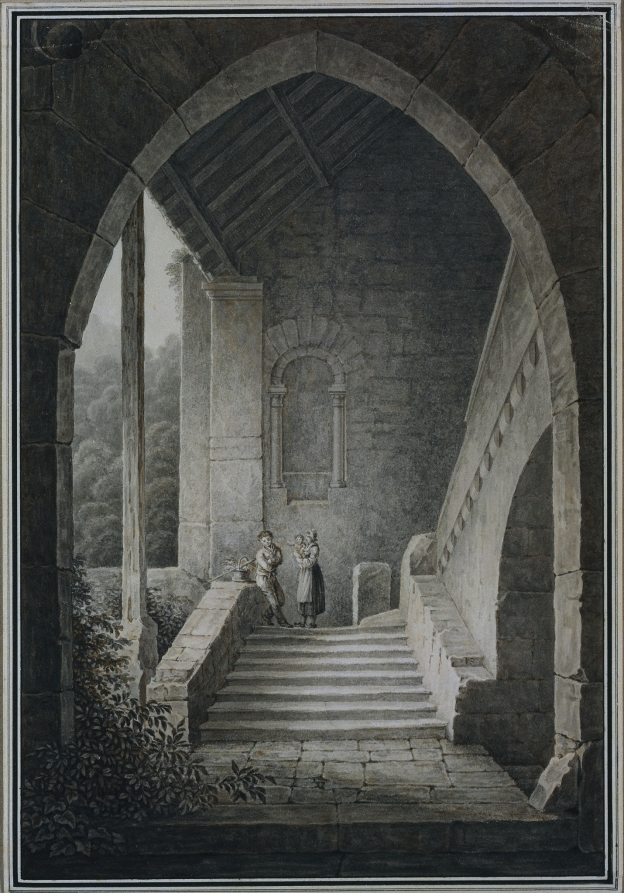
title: Outer Staircase of a Gothic Ruin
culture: Germany, 19th century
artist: Domenico Quaglio (German, 1787–1837)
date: 1830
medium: gray and brown wash and framing lines in pen and black ink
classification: Drawing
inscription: signed, on verso, at lower right, in graphite: D. Quaglio f. in Decbr. 1830; inscribed, at lower left, in graphite: Domenico Quaglio d. F. [paraph: ey?] / 1786-1837; inscribed, at lower center, in graphite: Ansicht einer Ruine in / Meillerie Villaneuve des / gez. Dez. 1830; inscribed, at lower right, in graphite: Linken Ufer des Genfer see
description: Rejecting the preference for the landscape and architecture of Italy, as seen in the work of many of his contemporaries, Domenico Quaglio portrayed the buildings of his native Germany. Here, Quaglio depicted a man, woman, and child who are dwarfed by the immense scale of a Gothic cathedral’s ruined arch, within which the figures appear. Overrun by vines and set within a dense forest, the architecture signifies the magnitude of God in the Christian faith and the smallness of mankind.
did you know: Gothic architecture, the type seen in this drawing, was associated with Germany based on a false assumption that a Germanic tribe, the Goths, had originated the style.